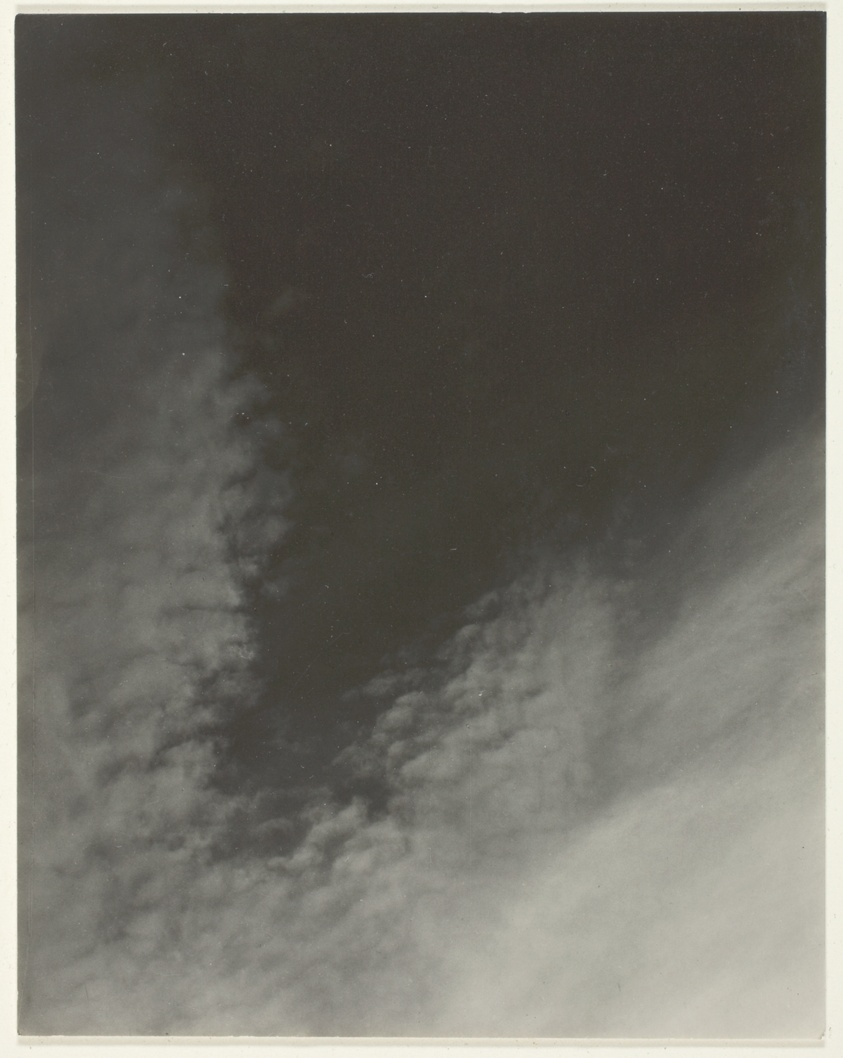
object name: Photograph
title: Equivalent, from Set E (Print 3)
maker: Alfred Stieglitz (American, 1864–1946)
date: 1923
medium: Gelatin silver print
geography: United States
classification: gelatin silver (developing-out-paper) pr; photographic process; photography; photograph